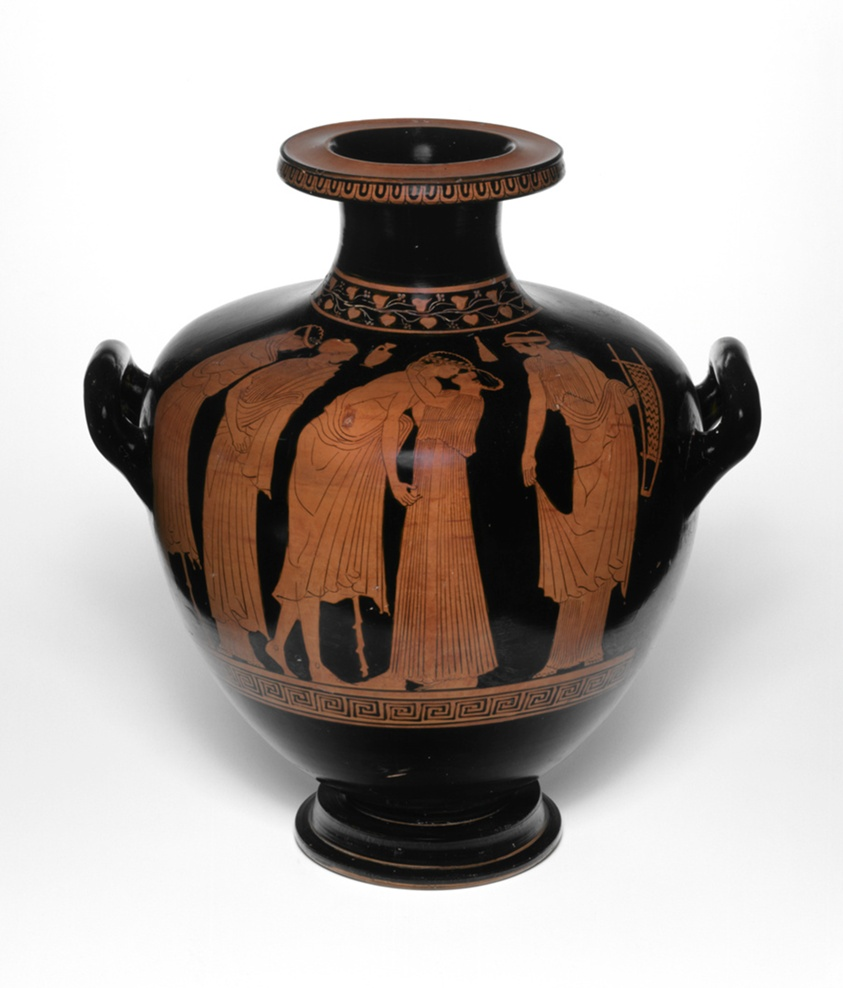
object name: Vessel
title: Hydria (Water Jar)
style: high classical, Classical, attic, red-figure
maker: Attributed to The Leningrad Painter; Greek; Athens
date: 470-460 BCE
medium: terracotta, red-figure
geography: Athens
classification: vessel; earthenware; ceramics; ancient art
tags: sex, women